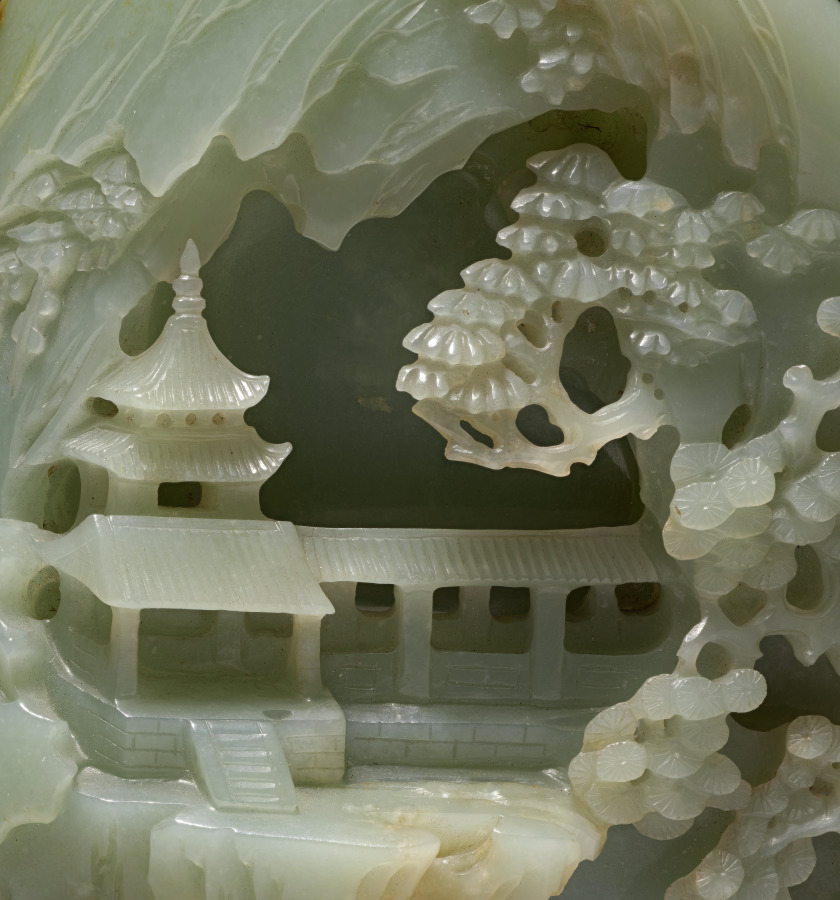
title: Miniature Mountain with Daoist Paradise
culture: China, Qing dynasty (1644–1911), Qianlong reign (1736–95)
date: 1736–95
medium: green jade with brown markings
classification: Jade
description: Sizable jade boulders of mountainous landscapes were carved to represent the search for the paradise or immortals' dwellings in the mountains. This Daoist theme has fired the Chinese imagination throughout history. Believed to have spiritual and magical properties, jade has long been used in tombs and intended for preserving the corporeal body and the soul in the quest for eternity. It is recorded that Daoist practitioners drank morning dews with scraps of jade as an elixir of immortality.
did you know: The bearded immortal is accompanied by a servant carrying a cluster of peaches, symbols of immortality.